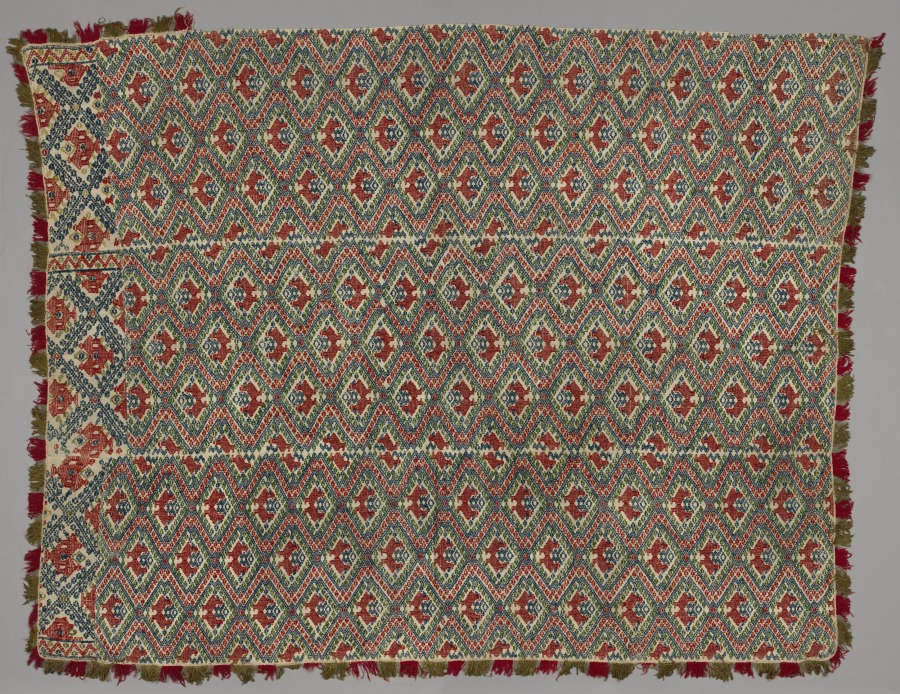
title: Bedspread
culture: Italy, Sicily, 17th-18th century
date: 17th-18th century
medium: linen ornamented with woolen brocading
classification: Textile